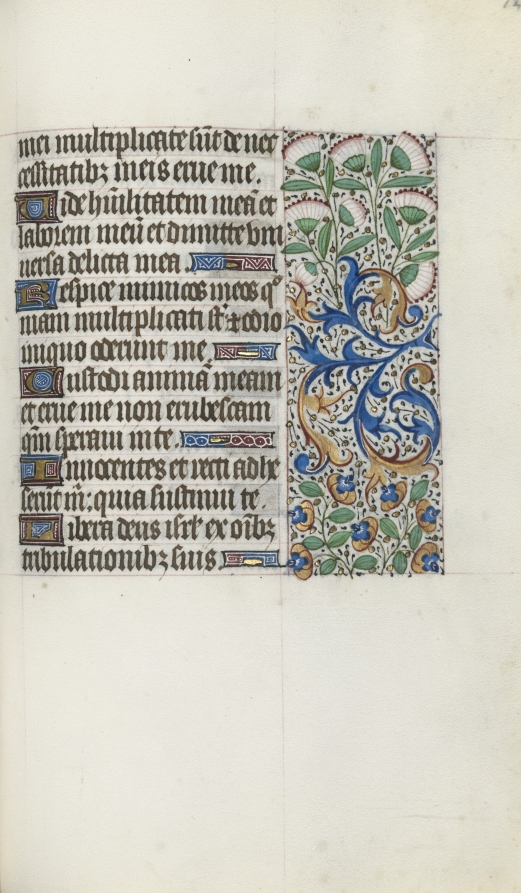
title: Book of Hours (Use of Rouen): fol. 120r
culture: France, Rouen, 15th century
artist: Master of the Geneva Latini (French, active Rouen, 1460–80)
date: c. 1470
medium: ink, tempera, and gold on vellum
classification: Bound Volume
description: In the late 1400s and early 1500s Rouen was an established and important center of book production. The city’s cathedral had a wealthy chapter that spent large sums of money to commission books and to maintain its extensive library. The stationers and booksellers would have likely been concentrated in or near the cathedral precinct. This artist, named after a manuscript now in Geneva, was Rouen’s principal illuminator during the second half of the 1400s.